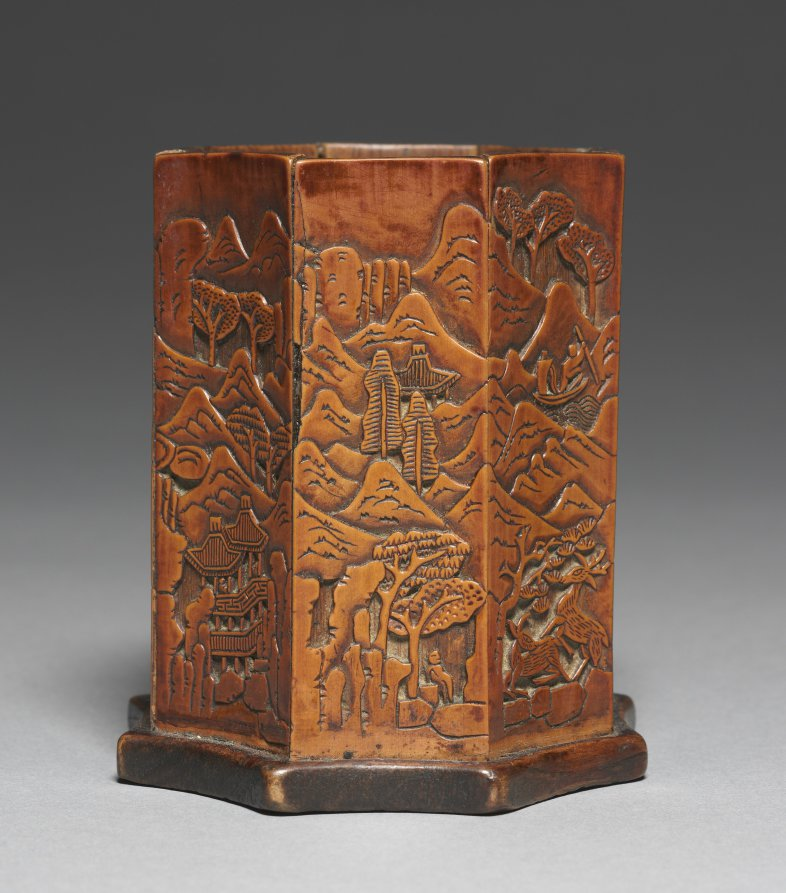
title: Brush Holder with Bamboo and Landscape Design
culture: Korea, Joseon dynasty (1392–1910)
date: 1800s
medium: carved bamboo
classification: Wood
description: An 18th-century Korean collector Yu Man-joo (1755–1788) wrote that “spending money on luxury clothing, dishes, and decorations for the home is a waste, but acquiring fancy writing tools helps to develop elegant taste and high-mindedness.” Inspired by aesthetic discourses on elegance versus vulgarity in late Ming Chinese literature, Korean collectors in the late 1700s and 1800s strove to assemble objects that would display their intellect and sophisticated taste. Stationery objects in particular—printed books, finely crafted brushes, brush holders, ink stones, water droppers, stone wares with grayish-white crackled glazes as well as bronze vessels, and incense burners—were all objects that reflected pure and elegant taste.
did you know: Stationery objects such as this brush holder were highly appreciated among scholars, not only for their function, but for their aesthetic.